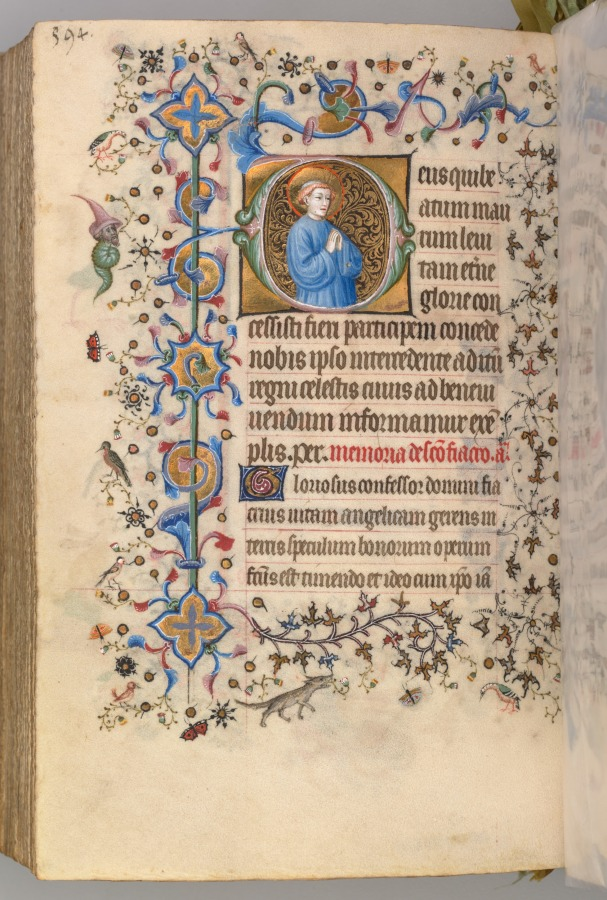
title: Hours of Charles the Noble, King of Navarre (1361-1425): fol. 291v, Text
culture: France, Paris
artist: Master of the Brussels Initials and Associates (French)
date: c. 1405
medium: ink, tempera, and gold on vellum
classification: Bound Volume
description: This precious volume was obviously highly prized by its owner, the French-born King of Navarre, who had his coat of arms painted on no less than twenty folios. Rather than directly commissioning this manuscript from a specific workshop, it seems that Charles the Noble acquired his book of hours -- perhaps ready-made for the luxury market -- while on a trip to Paris in 1404-05. A collaborative effort, six painting styles are evidenced within the pages of this codex, those of two Italians, two Frenchmen, and two Netherlanders. The painter who was responsible for the planning and decoration of the book, and who produced seventeen of the large miniatures, was a Bolognese artist known as the Master of the Brussels Initials. His principal assistant, responsible for most of the borders, was a Florentine who signed his name "Zecho" da Firenze on folio 208 verso.